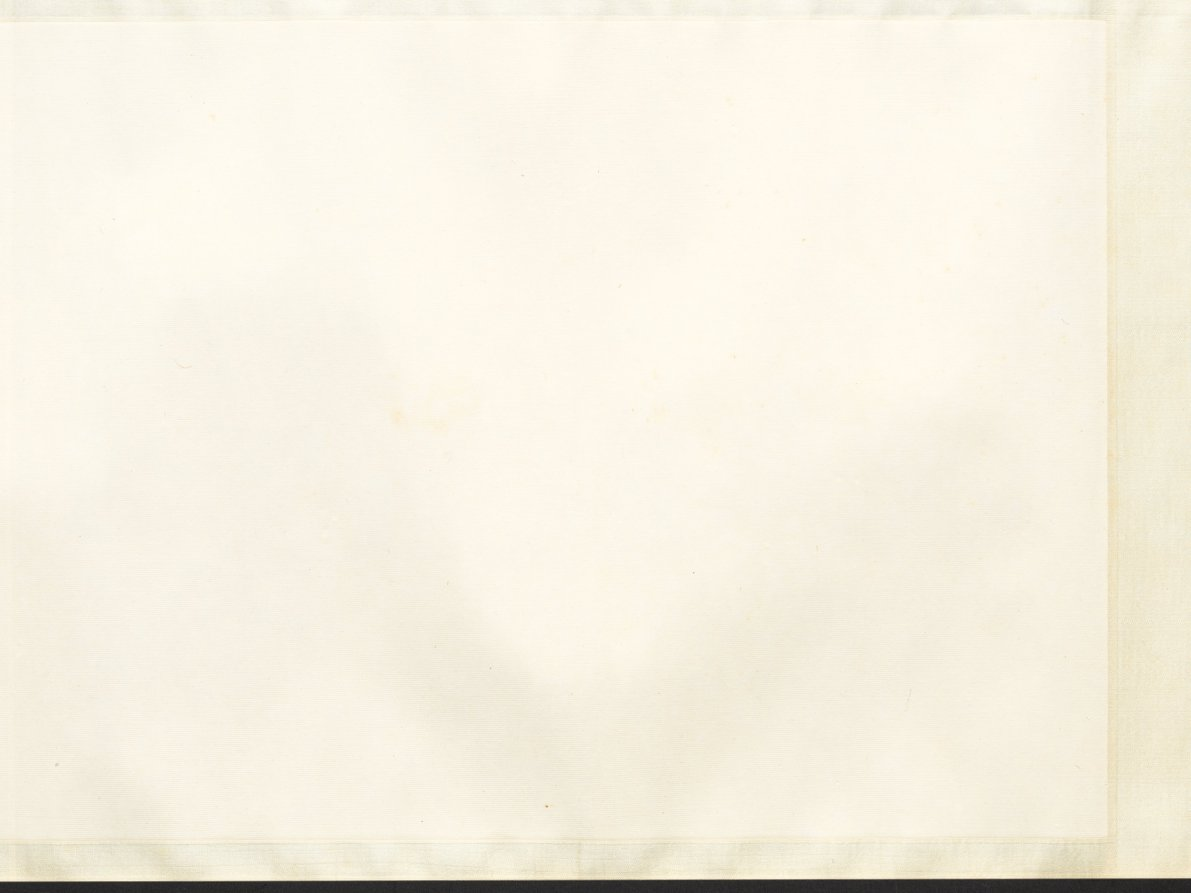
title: Fisherman's Joy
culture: China, Ming dynasty (1368–1644)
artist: Qian Gu (Chinese, 1508–c. 1578)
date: 1572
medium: Handscroll; ink and light color on paper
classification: Painting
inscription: Artist's inscription, signature, and seal: On the autumn day of the jen-shen year [1572], P'eng-ch'eng, Ch'ien Ku painted [this]. [seal] Hsüan-ch'ing shih. 2 colophons, both dated 1689, and 5 additional seals of Yün Shou-p'ing (1633-1690).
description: This painting has a scene showing two small crafts, each manned by two fishermen, practicing a traditional fishing method. In one of them, a man uses a bamboo pole to direct the movements of a cormorant bird sent into the water. Cormorant fishing, witnessed in some areas of the lower Yangzi River, appears in Zhe school paintings. Qian Gu may have borrowed these narrative figure scenes from Zhe school paintings, while his vantage point, brushwork, and soft tones align with the Wu school style. Scenes of fishermen appealed to urban and educated audiences who idealized the self-sufficient independence of fisherfolk.